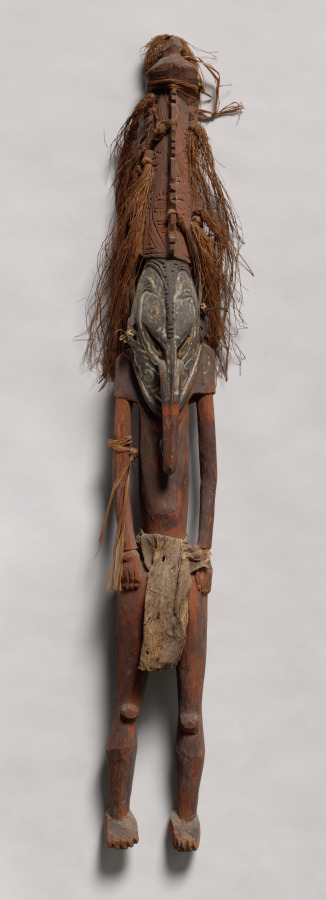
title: Ancestral Figure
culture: Melanesia, Papua New Guinea, Sepik River region, 19th century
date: 1800s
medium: painted wood with fiber and tapa cloth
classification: Sculpture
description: In the Sepik River region, village social and ceremonial life centers on the men's house. Ritual objects such as slit gongs, orators' stools, and flutes are stored there; the most sacred objects are kept hidden from women and children. Carved wooden figures, which probably represent ancestors, were preserved in the men's houses.